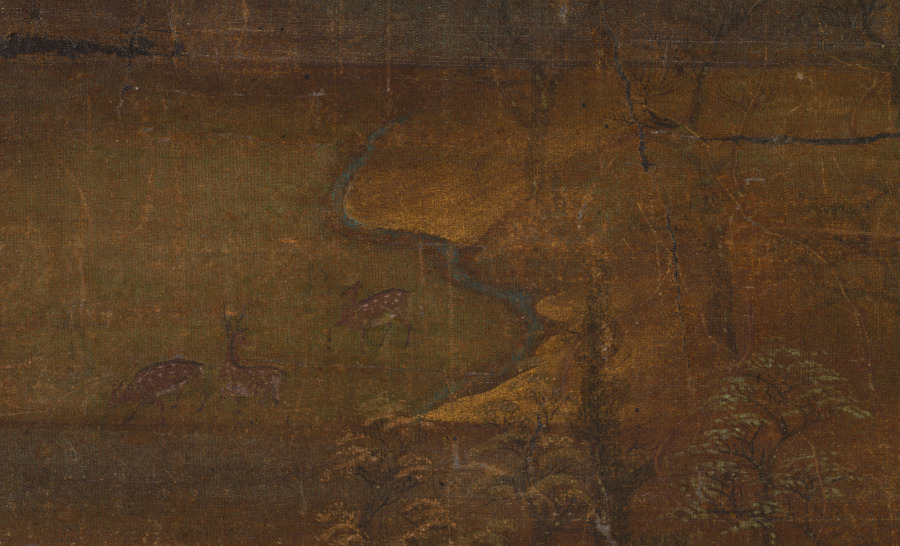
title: Kasuga Shrine Mandala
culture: Japan, Kamakura period (1185–1333)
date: early 1300s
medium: Hanging scroll; ink, color, and gold on silk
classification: Painting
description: A golden path beginning at the bottom of this painting leads up to four red-and-white buildings to the left, then to a fifth building on the right. These are the five shrine halls of Kasuga Taisha in Nara. Above and beyond the buildings is a sacred mountain range––with Mount Mikasa at center, Mount Wakakusa in gold to the left, and the sun or moon rising up behind the mountains. Sacred deer appear here and there. Five figures representing the original Buddhist forms of the five kami of the shrine complex stand on clouds above the mountains.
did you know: Sacred deer, the vehicles of the Kasuga deities, move about the shrine compound.